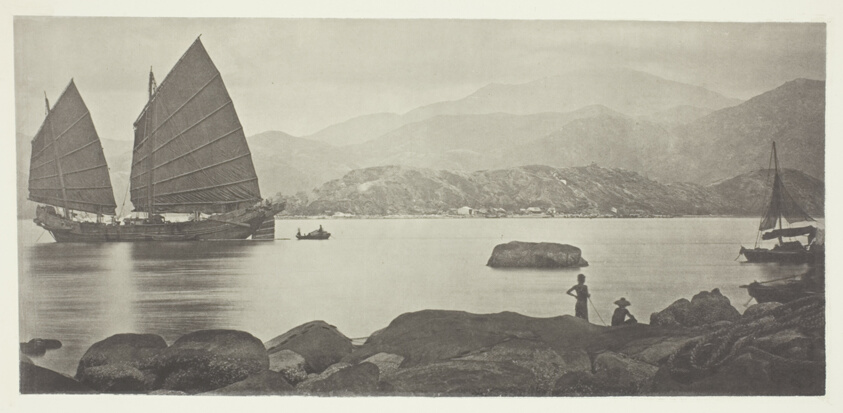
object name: Photograph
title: A Canton Trading Junk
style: 19th century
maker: John Thomson (Scottish, 1837–1921)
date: c. 1868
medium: Collotype, pl. VIII from the album "Illustrations of China and its People, Volume I" (1873)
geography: Scotland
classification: photography; photograph